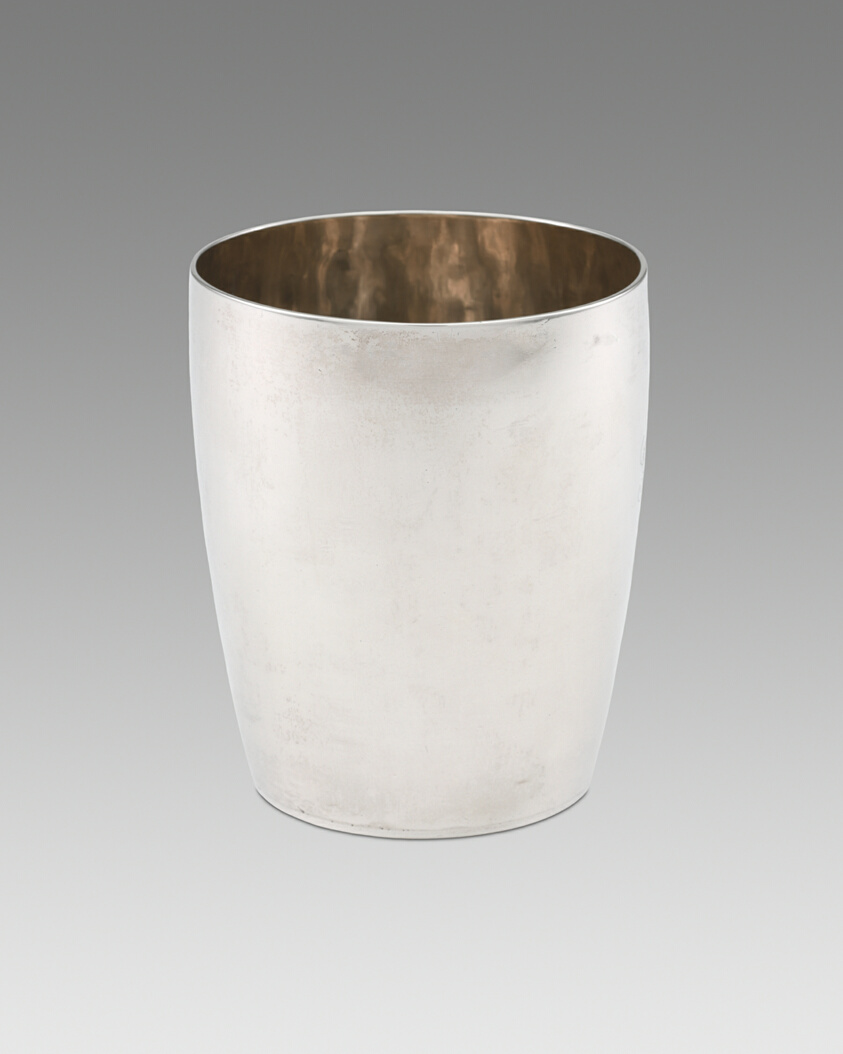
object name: Metalwork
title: Beaker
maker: Charles Farley (American, 1791–1877); Portland, Maine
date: 1812–30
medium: Silver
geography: Portland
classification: drinking vessel; silver; american decorative arts; american arts; decorative arts